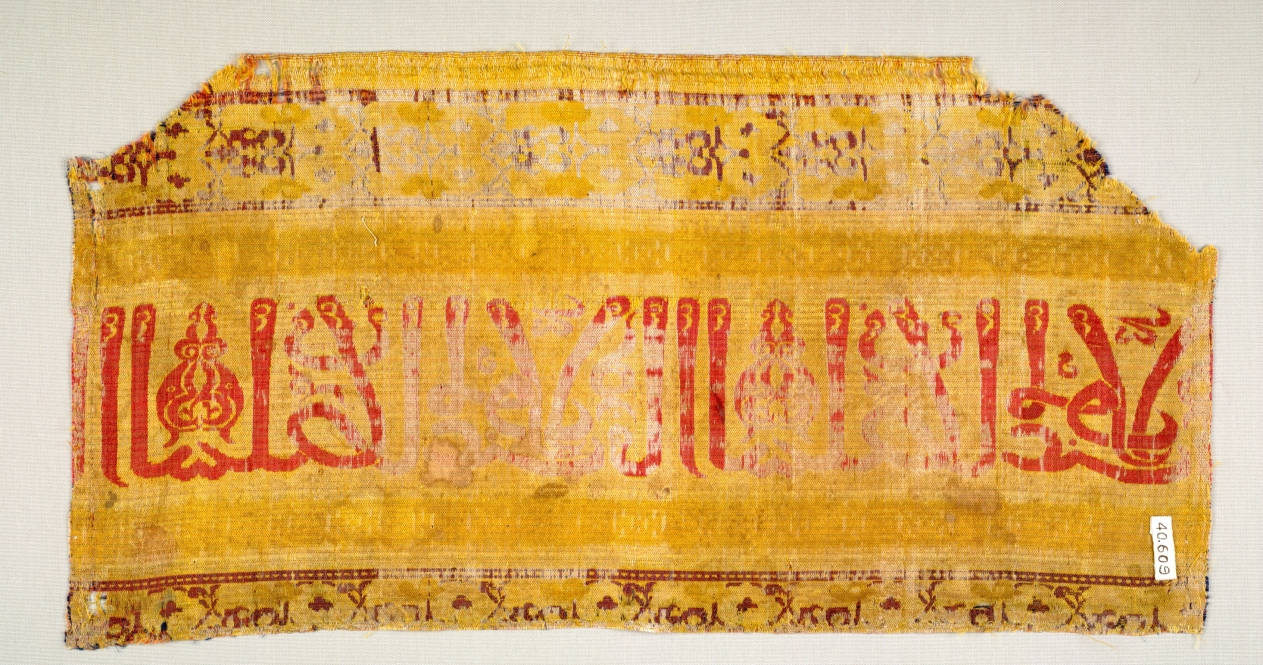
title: Striped Silk from a Garment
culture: Spain, Granada, Nasrid period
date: 1400s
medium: silk; lampas weave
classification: Textile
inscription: Naskhi inscription: "Glory to our Lord the Sultan."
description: Arabic inscriptions had religious significance to viewers regardless of their legibility. This text repeats "Glory to our Lord the Sultan," a phrase that also enhances the Alhambra Palace walls. For Muslims, Arabic texts symbolized the divine revelation of God’s word to the Prophet Muhammad and recorded in the holy Qur’an; for Spanish Catholics it represented the Holy Land. In striped silks, inscriptions often alternate with interlacing bands and palmettes. Inscribed silks have survived as Catholic church vestments.